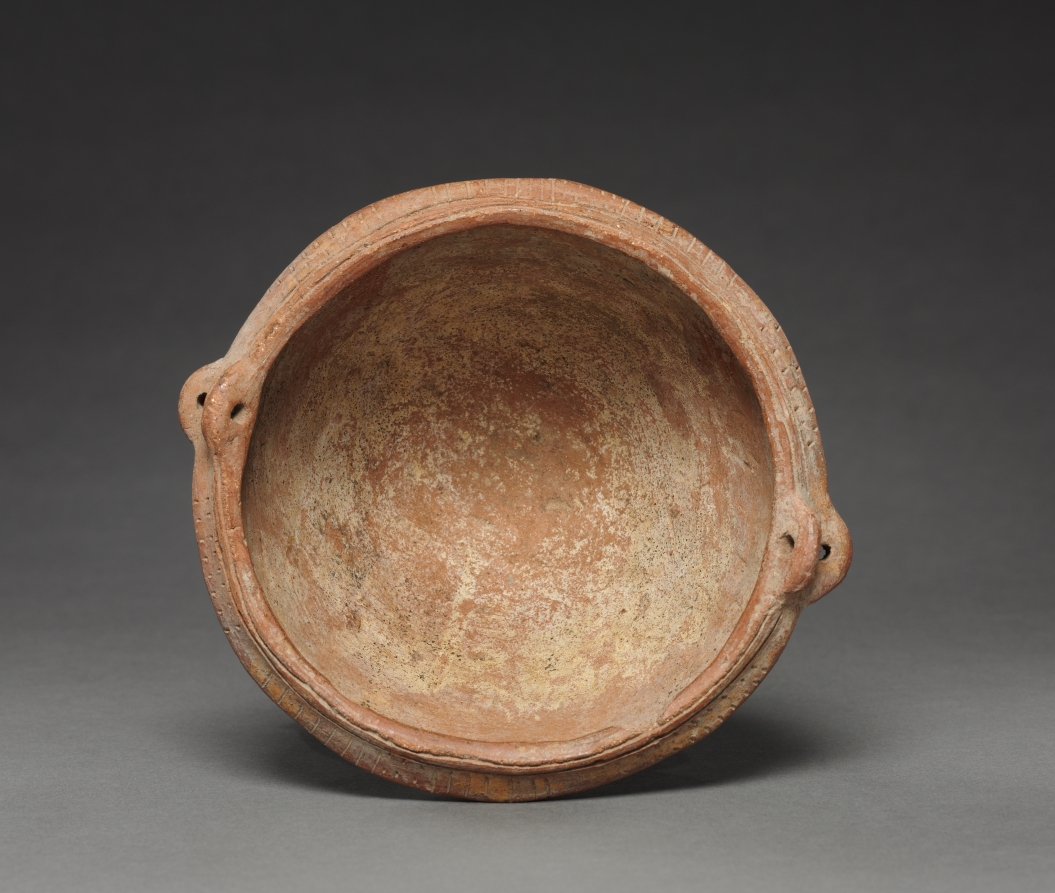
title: Dish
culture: Colombia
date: before 1550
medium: red ware with incised patterns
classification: Ceramic